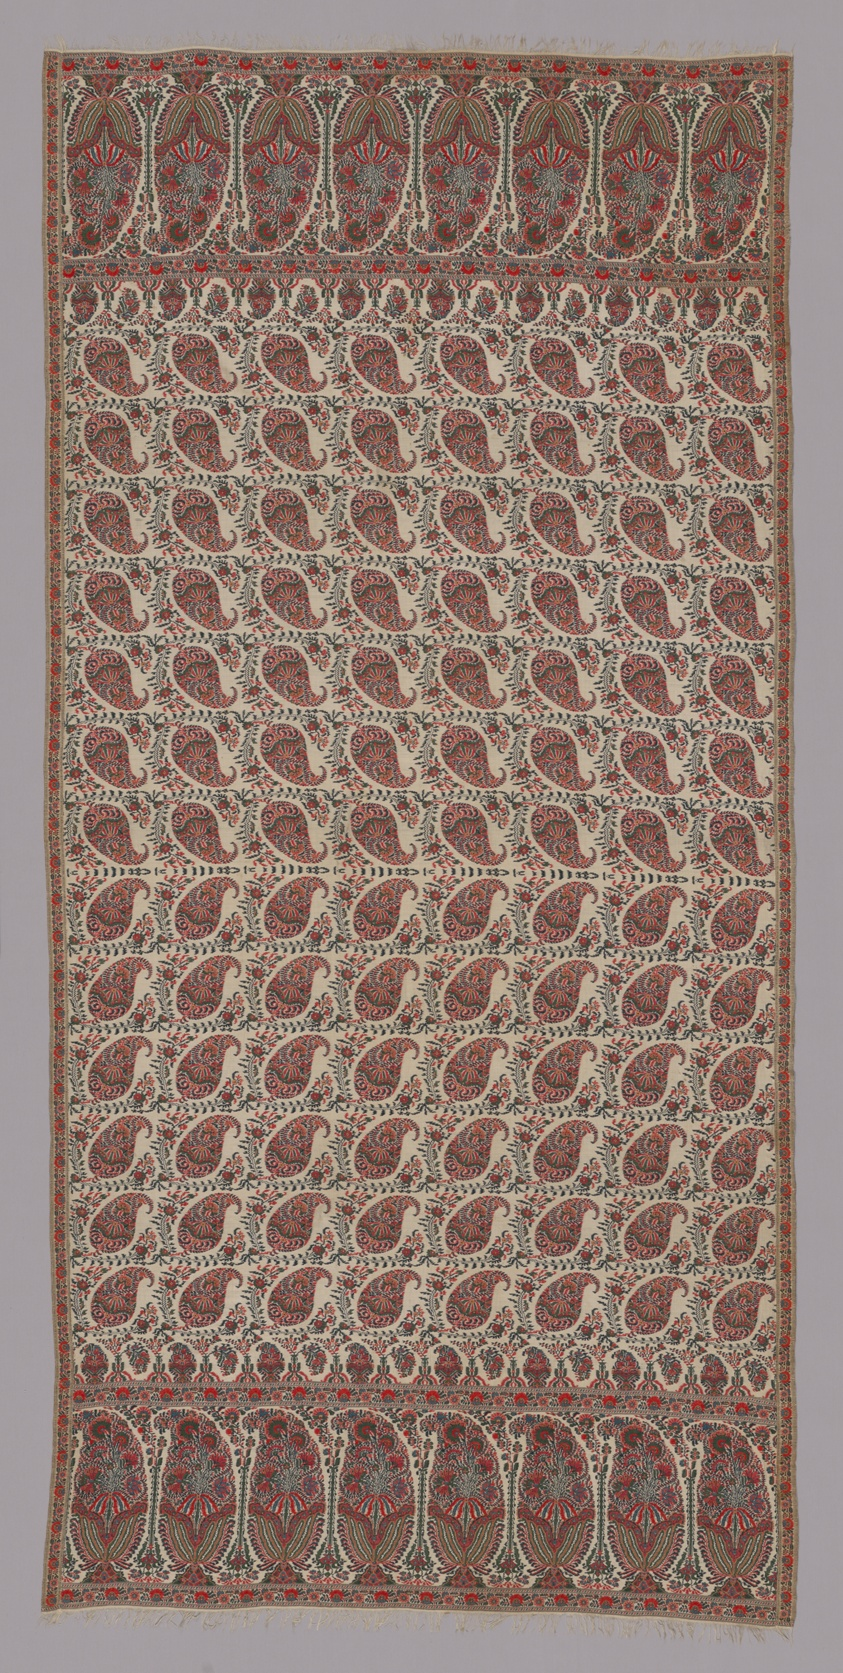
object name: Costume and Accessories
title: Woman's Long Shawl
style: 19th century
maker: Probably Norwich, England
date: 1820s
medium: Silk, cotton, and wool, warp-float faced 3:1 'S' twill weave with supplementary patterning wefts bound in weft-float faced 1:3 'S' twill interlacings; attached side borders of 2:2, 2:2, 1:3, 2:2...'Z' composite twill weaves with supplementary patterning wefts bound in weft-float faced 1:3 'Z' twill interlacings; main warp fringe; woven on loom with Jacquard attachment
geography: Norwich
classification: textile; weaving; costume; costume - weaving; costume accessory; garment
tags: paisley, flowers, floral, vines